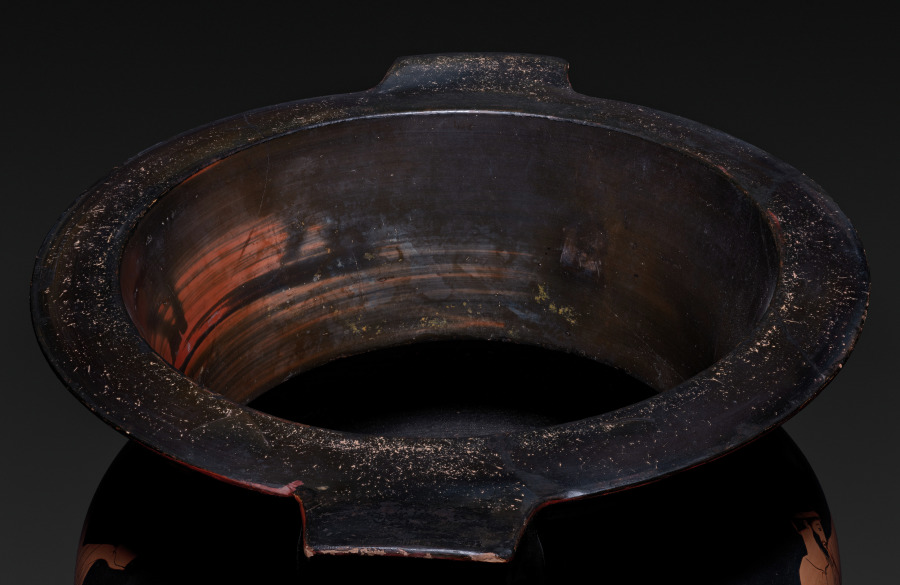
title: Red-Figure Column Krater (Mixing Vessel): Komos (Revel)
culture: Greek, Attic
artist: attributed to Pig Painter (Greek, Attic, active c. 480–460 BCE)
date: 470–460 BCE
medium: ceramic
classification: Ceramic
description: Used for mixing wine and water at a symposium (or drinking party), this column-krater speaks to the perils and pleasures of drinking. On one side, a bearded man holding a staff and a drinking cup leans forward, a red stream of vomit falling from his mouth. Before him is a nude young boy, holding a tortoiseshell lyre and a basket or pail. On the other side, a young man dances, holding a deep cup and wearing just one boot. On the neck above him, scratched in large letters, is the name SIMONOS, probably indicating that the vase once belonged to someone named Simon.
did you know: The bearded man on this vase is vomiting—perhaps a humorous warning against over imbibing.